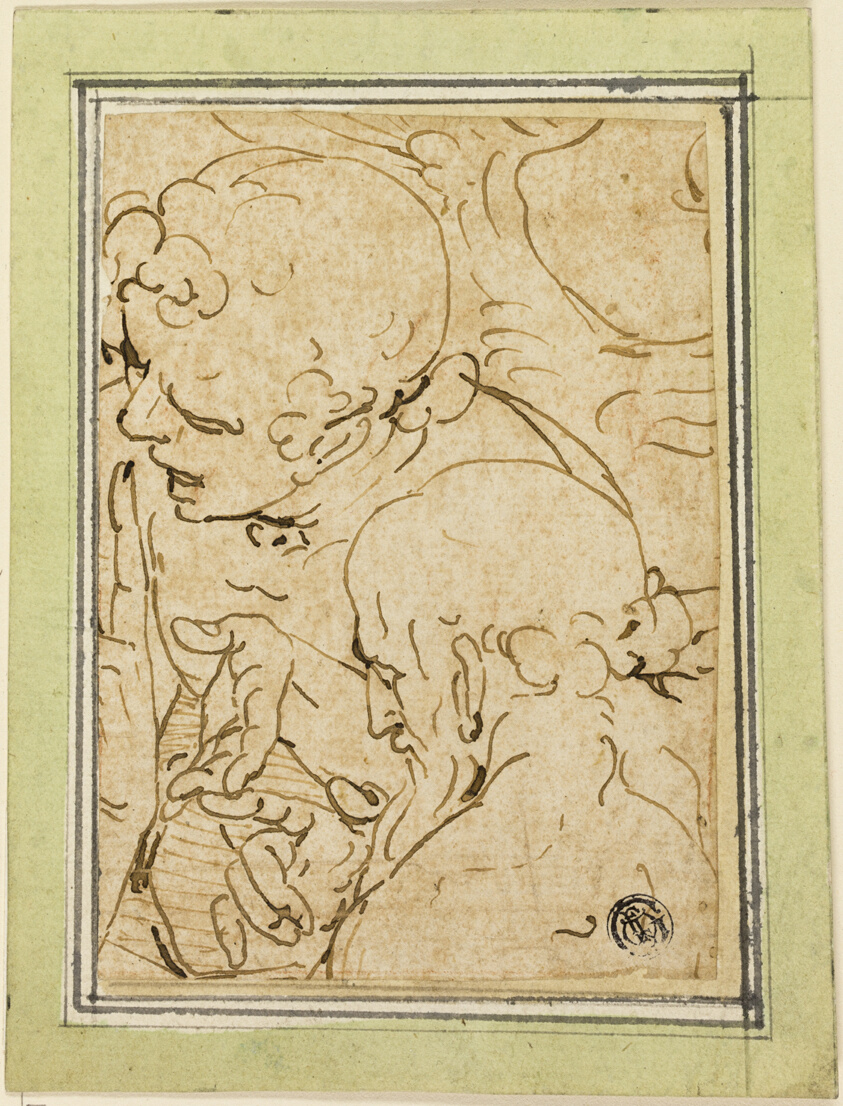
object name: Drawing and Watercolor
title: Two Evangelists Conversing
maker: After Luca Cambiaso; Italian, 1527-1585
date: after 1570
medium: Pen and brown ink on ivory laid paper, laid down on ivory laid paper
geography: Italy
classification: pen and ink drawings; drawings (visual works); prints and drawing